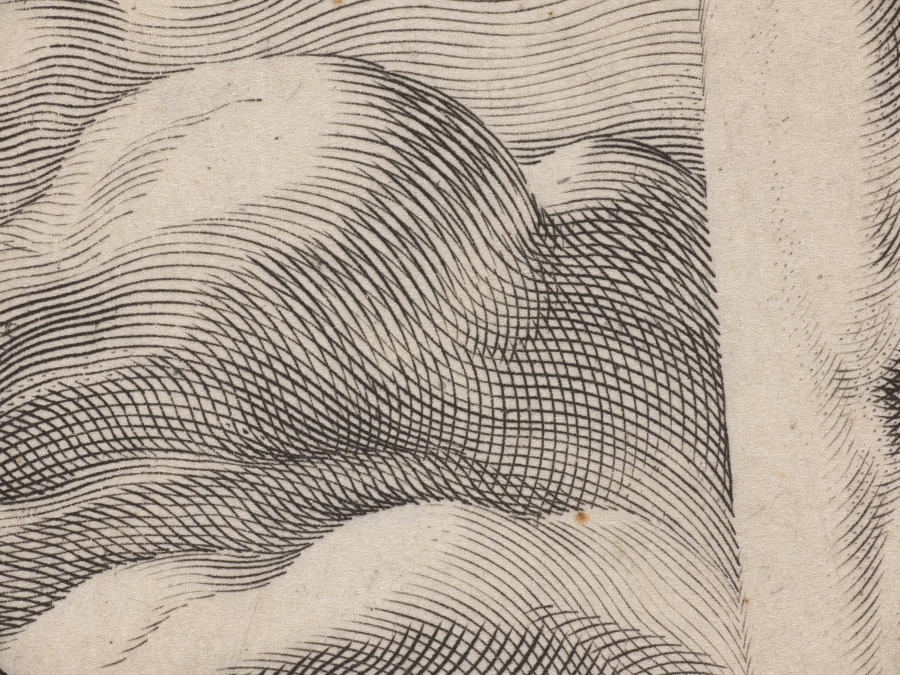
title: Apollo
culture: Netherlands, 16th century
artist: Hendrick Goltzius (Dutch, 1558–1617)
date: 1588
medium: engraving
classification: Print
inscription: upper center, in plate (words form a halo around Apollo's head): Sol rutilus radiante coma, et fulgore corusco / Dispellit tenebras, totumque illuminat orbem ; lower center, in plate: HG.[in monogram] fe. ; lower center, in plate: A°.88. ; VERSO, upper center, in graphite: 38 N°60 ; upper center, in graphite: H. Goltzius ; lower center, in graphite: C3575 7. ; lower center, in graphite: 1-10 ; lower right, in graphite: H 131 ; lower right, in graphite: 12[circled] ; lower left, in graphite: 1C [lt?]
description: This engraving depicts Apollo as the radiant sun god. With fire-like hair, he strides through rolling waves of clouds, while in the background his chariot makes its daily trip across the sky. The Latin text that forms his halo translates: “With its aureole and shining ray, the bright Sun drives away the darkness and lights the whole earth.” Apollo’s excessively muscled body reflects an aspect of Mannerism, a stylistic trend in the mid- to late 1500s that exaggerated natural qualities. By over embellishing Apollo’s musculature, Goltzius transformed an athletic male body into a supernatural one.